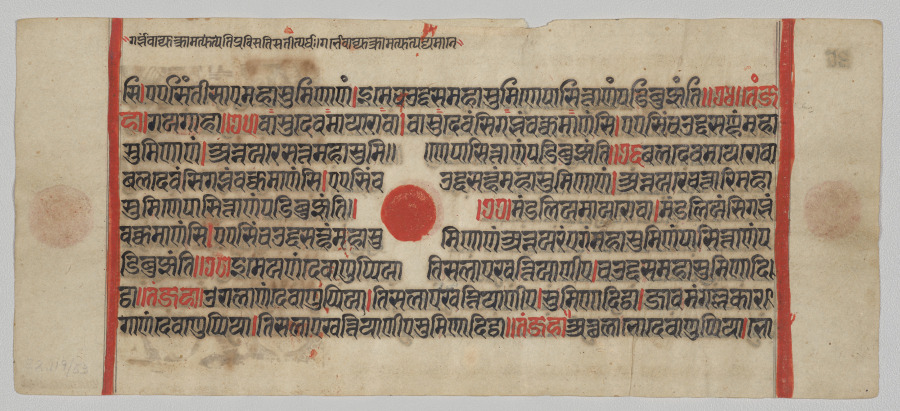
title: Text, Folio 26 (recto), from a Kalpa-sutra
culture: Western India, Gujarat, last quarter of the 15th century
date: c. 1475–1500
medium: Gum tempera, ink, and gold on paper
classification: Painting